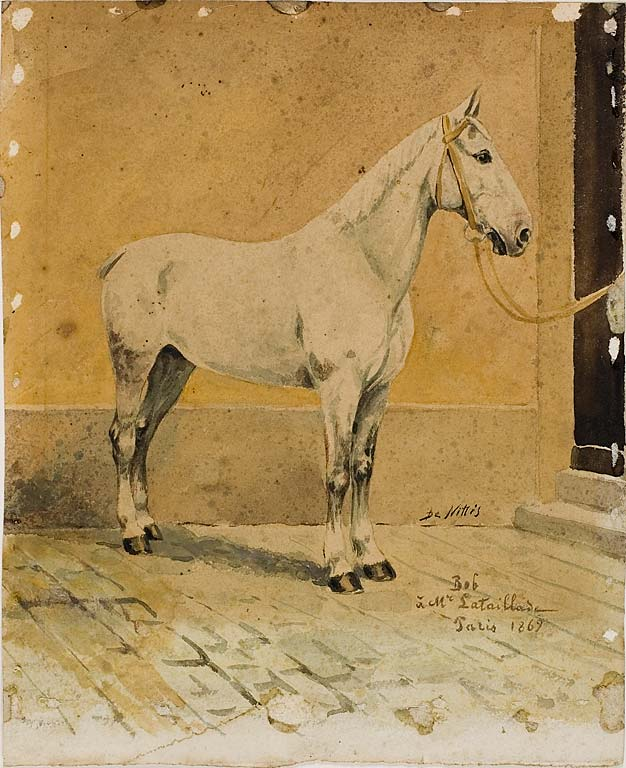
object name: Drawing and Watercolor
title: Bob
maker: Giuseppe de Nittis; Italian, 1845/46-1884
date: 1869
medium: Watercolor, over graphite, on cream wove paper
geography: Italy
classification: watercolor; drawings (visual works); prints and drawing